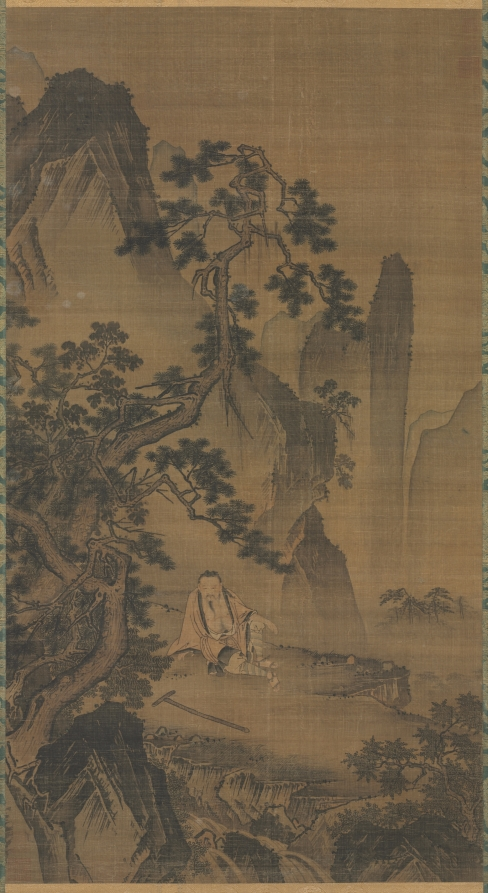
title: The Hermit Xu You Resting by a Stream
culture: China, Ming dynasty (1368–1644)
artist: Dai Jin (Chinese, 1388–1462)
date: 1400s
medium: Hanging scroll; ink and slight color on silk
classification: Painting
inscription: 5 seals: 1 of Huang Lin 黄琳 (active about 1496–1532); 4 unidentified.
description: Xu You, a recluse who refused the throne offered to him by legendary Emperor Yao, chose instead to farm on Mount Ji. Sitting under cliffs, his left arm resting on his risen leg and his loose robe revealing his belly, he displays a nonchalant attitude. Xu You is wearing a laborer’s outfit, a short robe and tight leggings, while his composed pose and gentle features reveal his lofty character. The composition shows rising mountains on the left juxtaposed by open space on the far right. Powerful brushstrokes and nuanced ink washes follow the style of the Southern Song (1127–1279) academy painters.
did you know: When the emperor offered him a post overseeing the Nine Territories (as China was known in ancient times), Xu You went to the River Ying to cleanse his ears from such an unwelcome proposition.